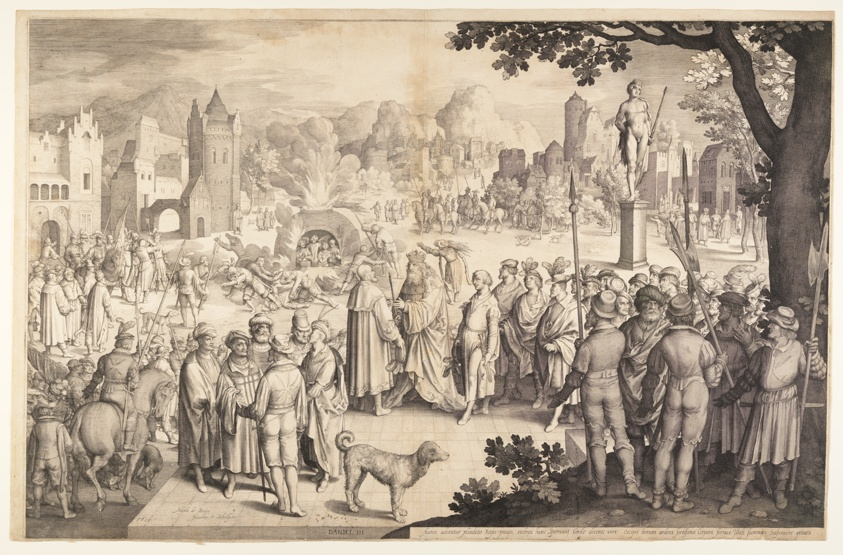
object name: Print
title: Shadrach, Meshach, and Abednego in the Burning Stove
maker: Nicolaes de Bruyn (Flemish, 1571–1656)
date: 1610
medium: Engraving on ivory laid paper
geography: Flanders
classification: engraving; paper; print; prints and drawing